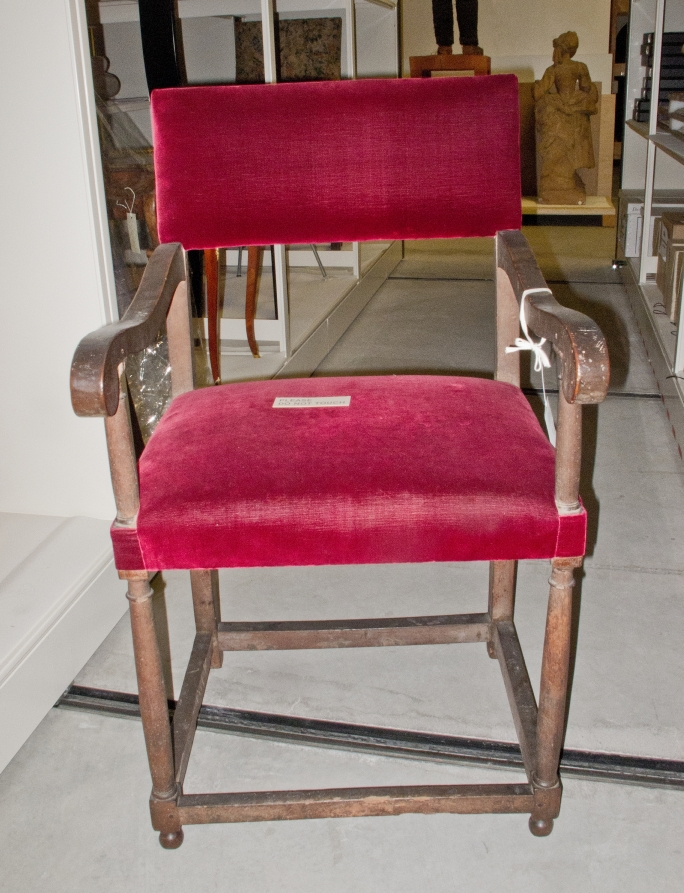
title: Armchair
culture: France, Henri II style, 16th century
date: 1500s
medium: walnut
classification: Furniture and woodwork